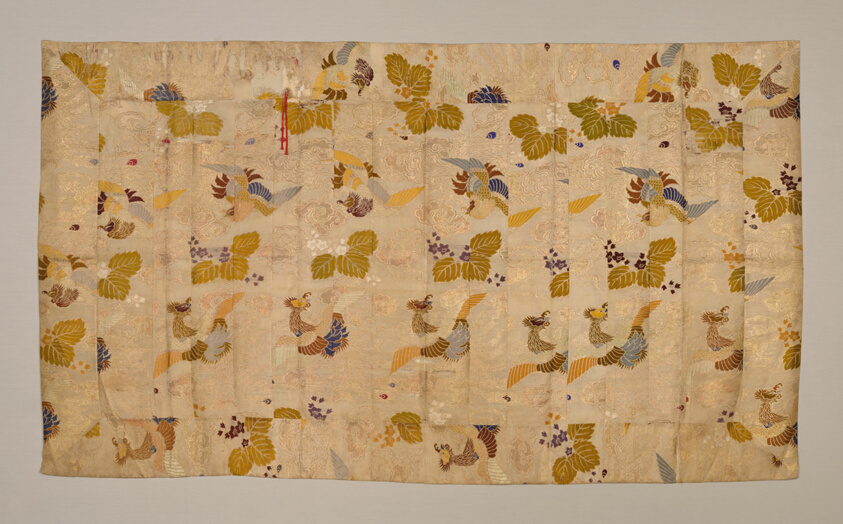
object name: Textile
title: Kesa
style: late edo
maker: Japan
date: late Edo period (1789–1868), 1800/50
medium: Silk, gold-leaf-on-lacquered-paper-strip wrapped silk and gold-leaf-over-lacquered-paper-strip, plain weave with supplementary patterning wefts bound in weft-float faced 1:3 ‘Z‘ twill interlacings; lining: silk, plain weave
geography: Japan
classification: textile; liturgical - buddhist; weaving